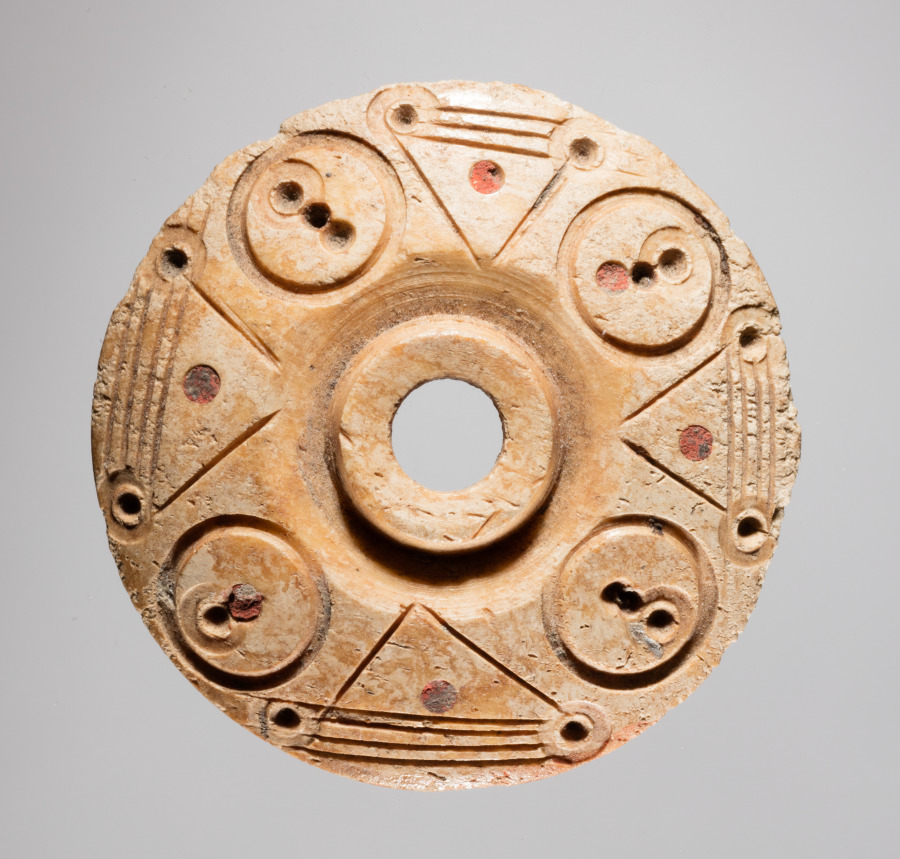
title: Spindle Whorl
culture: Iran, early Islamic period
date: 700s - 900s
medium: bone, incised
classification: Spindle Whorl